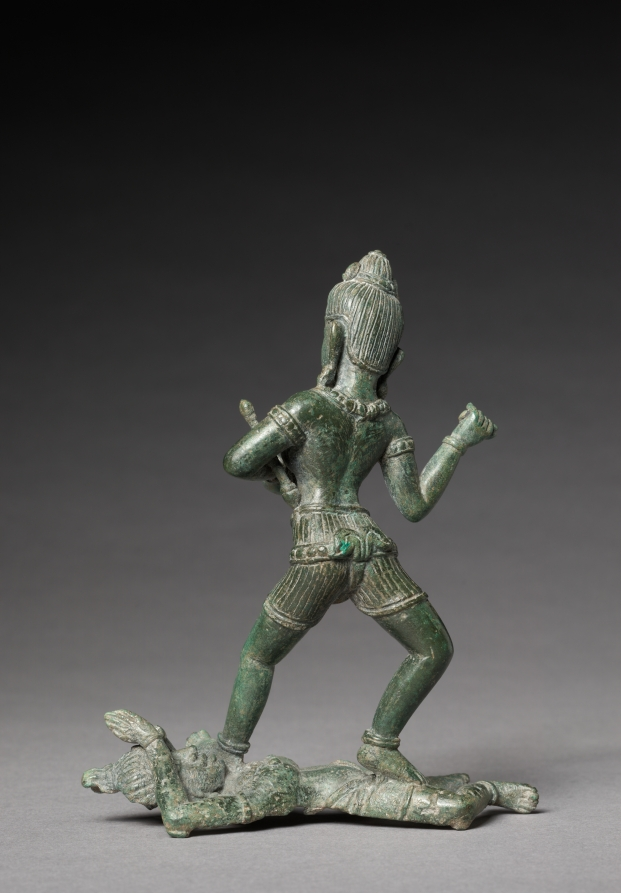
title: A Dakini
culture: Cambodia, Angkor, 11th century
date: c. 1100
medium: bronze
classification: Sculpture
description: An extremely rare bronze of a tantric Buddhist deity depicts the trampling of the personifications the of the afflictions that keep beings cycling around the world of samsara, moving from one unhappy birth, death, and rebirth to another. This female deity appears to hold a skull cup in her left hand, with a mace in the crook of her elbow, and she grasps an unclear object that may be a flaying knife in her upraised right hand.